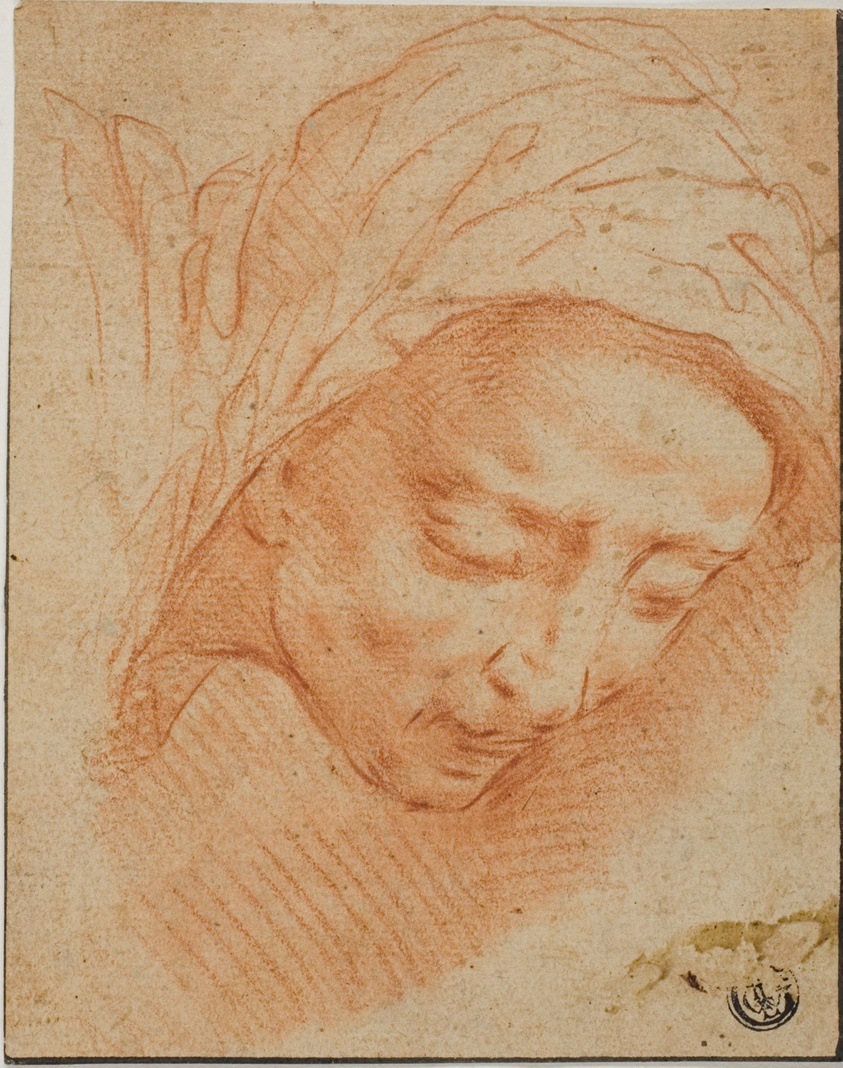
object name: Drawing and Watercolor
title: Woman's Head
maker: Bernardino Poccetti (Italian, 1548-1612)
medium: Red chalk on tan laid paper, partially laid down on ivory wove paper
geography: Italy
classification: chalk; drawings (visual works); prints and drawing